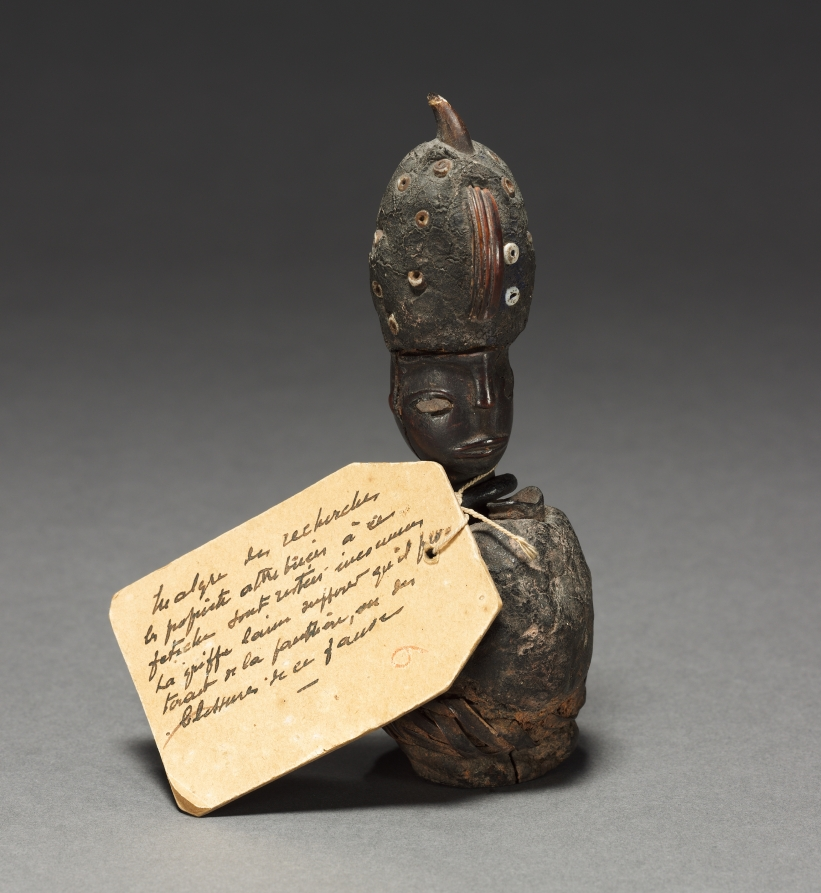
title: Power figure (nkisi)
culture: Central Africa, Republic of the Congo, Kongo people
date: late 1800s-early 1900s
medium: Wood, organic materials (including resin), iron, reed, tooth, seashell or glass beads, and possibly plastic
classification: Sculpture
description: One of seven anthropomorphic figurines, these minkisi contained medicines in which an ancestral spirit was believed to reside. Minkisi were objects of communal use; if conflict arose between two citizens, the Nkisi figure, along with the nganga (ritual leader) helped resolve the dispute. This small figure belonged to “the sorcerer of Loango,” chief of all sorcerers of that region (a province and port in West Central Africa).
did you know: This small figure belonged to “the sorcerer of Loango,” chief of all sorcerers of that region (a province and port in West Central Africa).